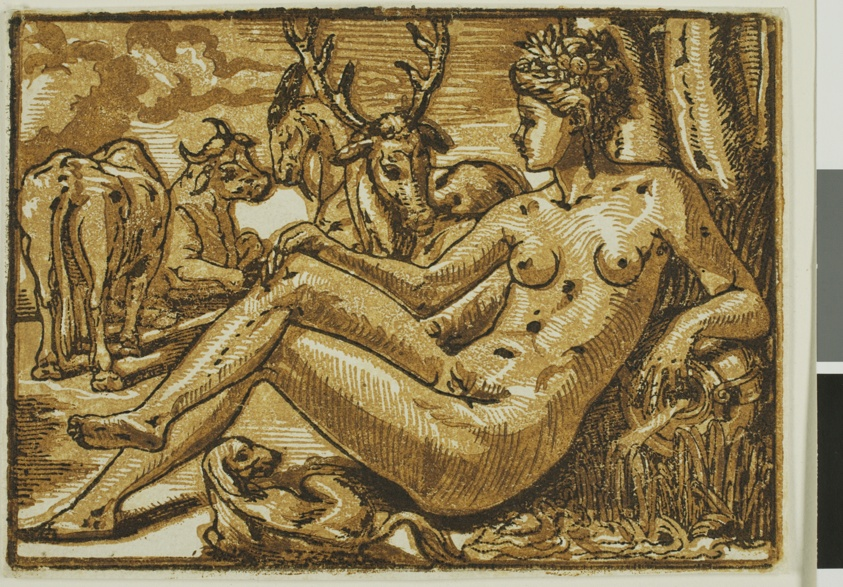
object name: Print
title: Nymph of Fontainebleau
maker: Unknown artist; Probably French, 16th century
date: after 1545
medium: Chiaroscuro woodcut in black, brown, and ocher on ivory laid paper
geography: Netherlands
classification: woodcut; print; prints and drawing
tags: dogs, animals